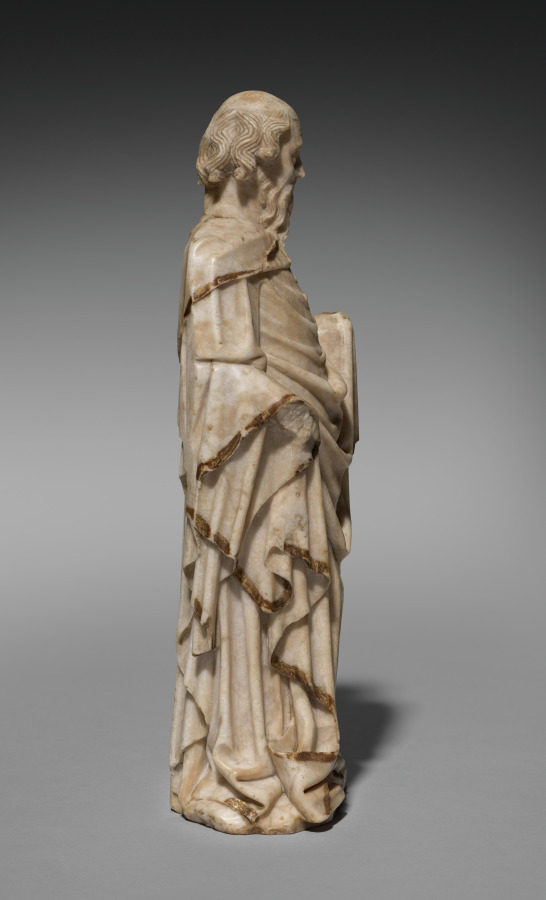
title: Standing Apostle (Saint Paul?)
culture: Southern Netherlands or Northern France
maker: Master of the Saint-Omer Apostles (Southern Netherlandish, active Bruges?)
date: c. 1430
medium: Alabaster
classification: Sculpture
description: This sculpture comes from an altarpiece in the cathedral of Saint Omer in northern France. Four other figures have been preserved there, and possibly one at the Metropolitan Museum in New York. The workshop was probably located in Bruges, in what is now Belgium. Sculpture was the leading art genre at that time. The specialized workshops obtained the stone alabaster from distant quarries, in this case from the area of Würzburg in Bavaria (Germany), to form it intricately and deliver it to customers in almost all of Europe.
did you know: Alabaster is very soft; after 20 minutes of treatment with water the surface will dissolve.